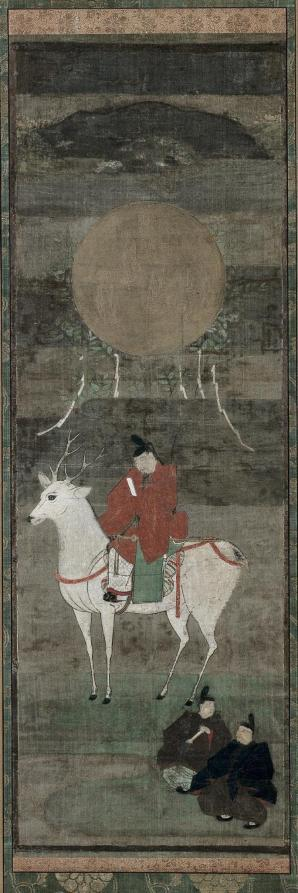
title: Departure from Kashima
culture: Japan, Nanbokuchō period (1336–92)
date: 1336–92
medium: hanging scroll; ink and color on silk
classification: Painting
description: The kami Takemikazuchi from Kashima (in present-day Ibaraki Prefecture) departs on a white deer for Mount Mikasa in Nara, where he takes up residence. The five Kasuga kami are presented within a golden circle supported by the branches of a sakaki tree, from which trail five white paper streamers—indicating the purity and sacredness of the five shrine halls of the complex—as well as blossoming wisteria vines, a symbol of the Fujiwara family. The two figures walking along near the stag’s back legs are Nakatomi no Tokifū and his younger brother Hidetsura, who have followed Takemikazuchi and become priests of Kasuga Taisha.